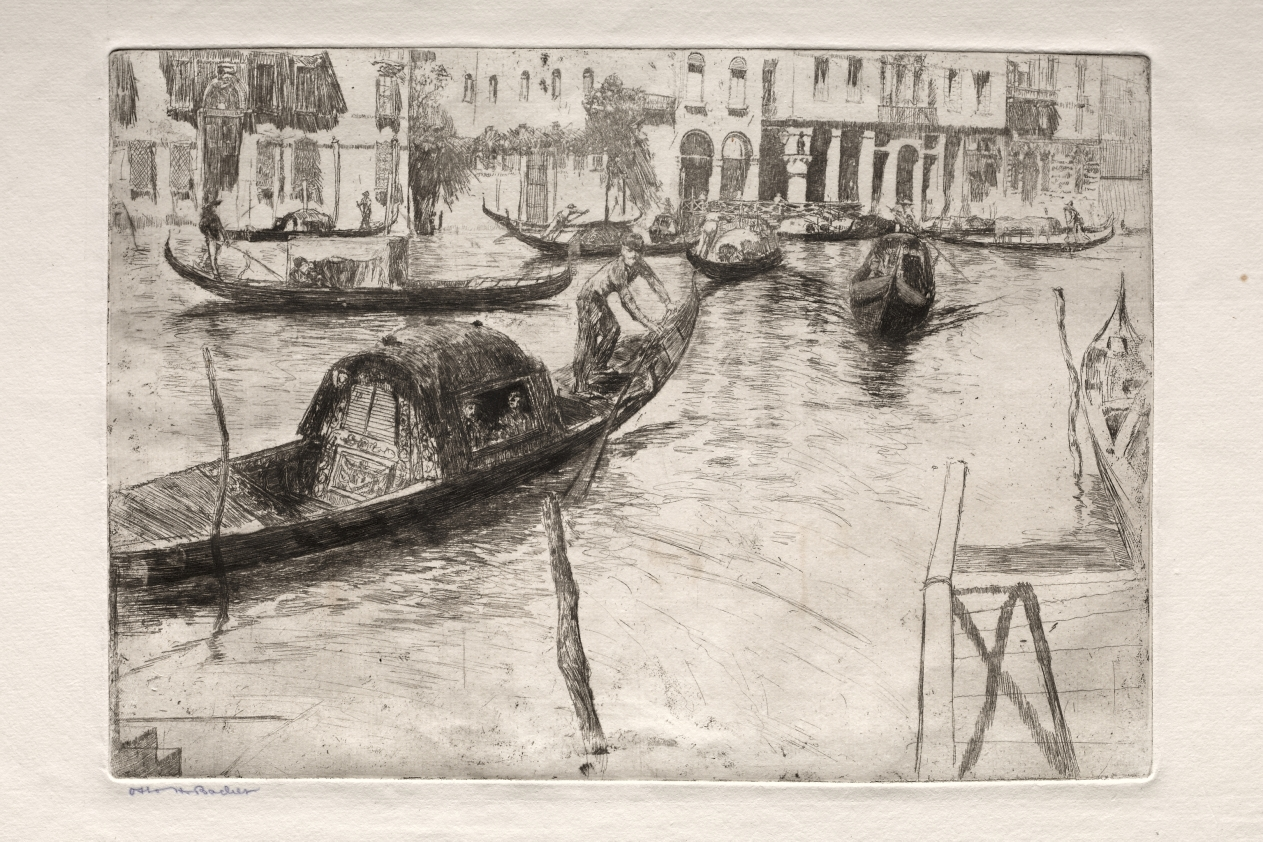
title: Etchings of Venice: Traghetto San Felice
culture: America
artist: Otto H. Bacher (American, 1856–1909)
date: 19th century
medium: etching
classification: Print